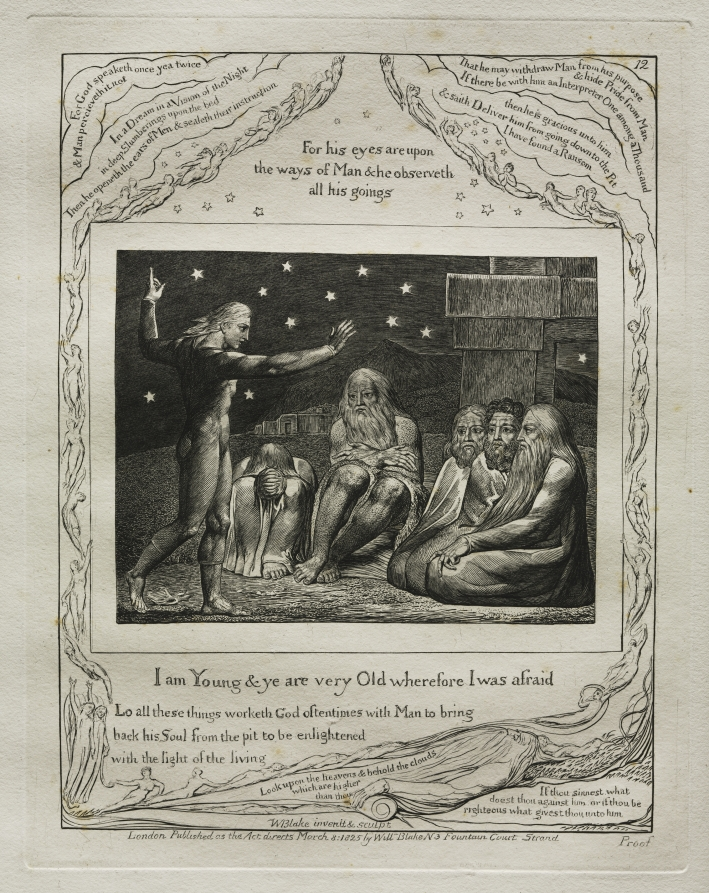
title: The Book of Job: Pl. 12, I am Young and ye are very Old wherefore I was afraid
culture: England, 18th century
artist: William Blake (British, 1757–1827)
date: 1825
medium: engraving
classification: Portfolio